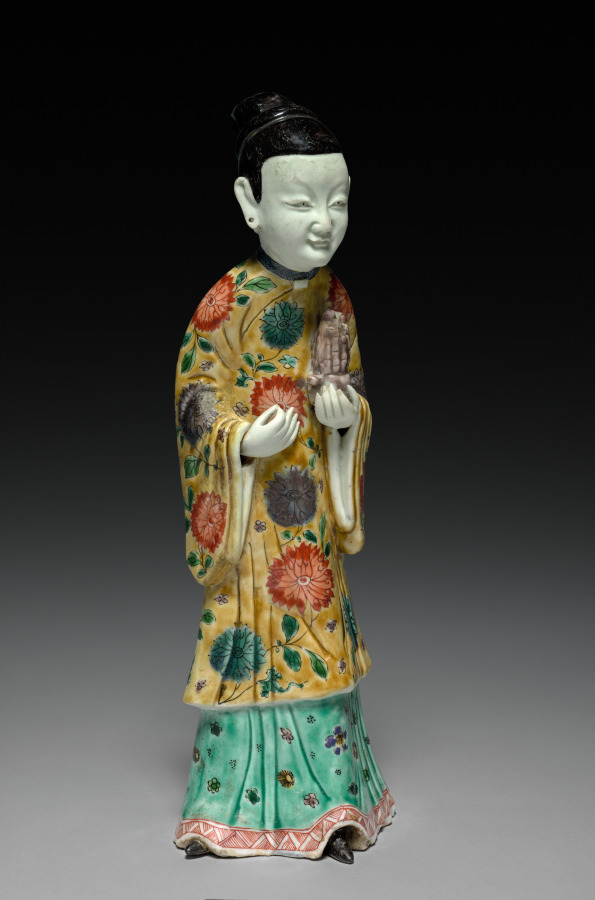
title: Court Lady Holding a Sheng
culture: China, Jiangxi province, Jingdezhen kilns, Qing dynasty (1644-1911), Kangxi reign (1662-1722)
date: 1662–1722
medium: porcelain with famille verte overglaze enamel decoration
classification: Ceramic